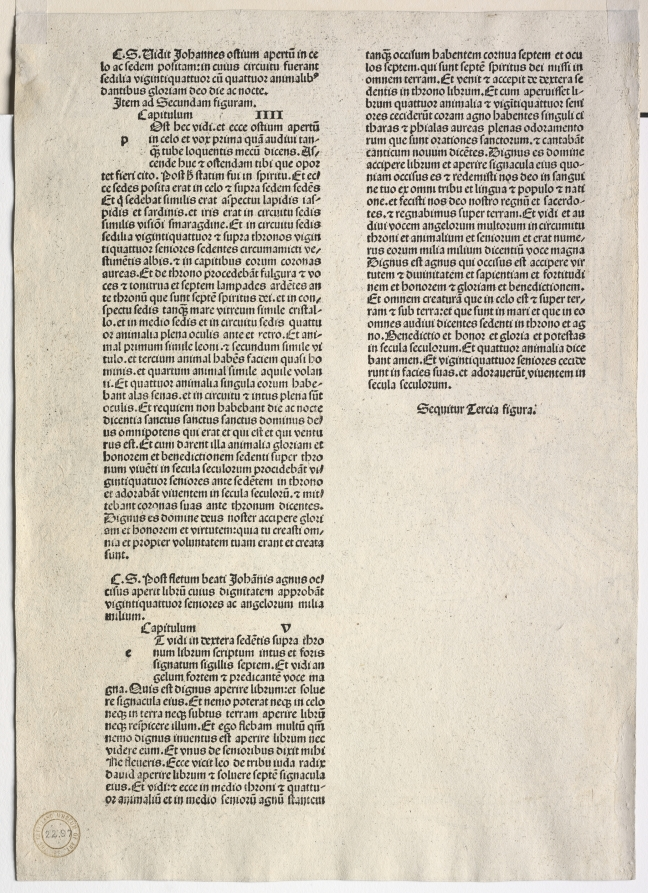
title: Revelation of St. John: St. John before the Throne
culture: Germany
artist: Albrecht Dürer (German, 1471–1528)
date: 1511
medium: woodcut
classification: Print